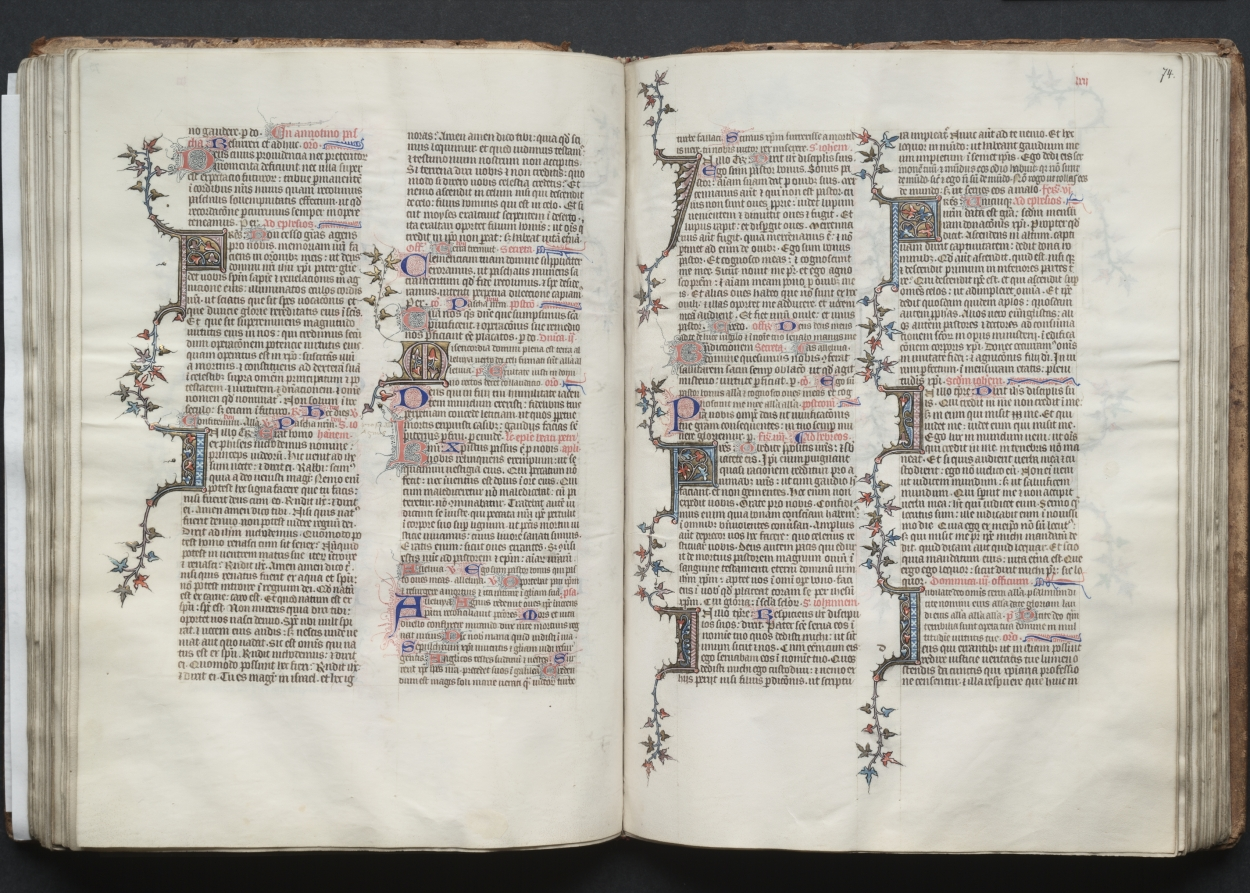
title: The Gotha Missal: Fol. 74r, Text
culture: France, Paris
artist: Master of the Boqueteaux (French)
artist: and Workshop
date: c. 1375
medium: ink, tempera, and gold on vellum; blind-tooled leather binding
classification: Bound Volume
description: The style and quality of this manuscript's decoration is typical of deluxe Parisian books made for aristocratic or royal patrons. Most of the book's decoration appears to be the work of the Master of the Boqueteaux, an artist active at the court of King Charles V (died 1380). His style was apparently shared by a number of book illuminators working in and around Paris. It is very possible that the Gotha Missal belonged to Charles V, but is not provable because the manuscript has no royal portraits and lacks a colophon. Given the book's magnificent decoration, however, it would seem that it was produced for a Valois prince, if not for the king himself. The manuscript receives its name from the German dukes of Gotha, its later owners.